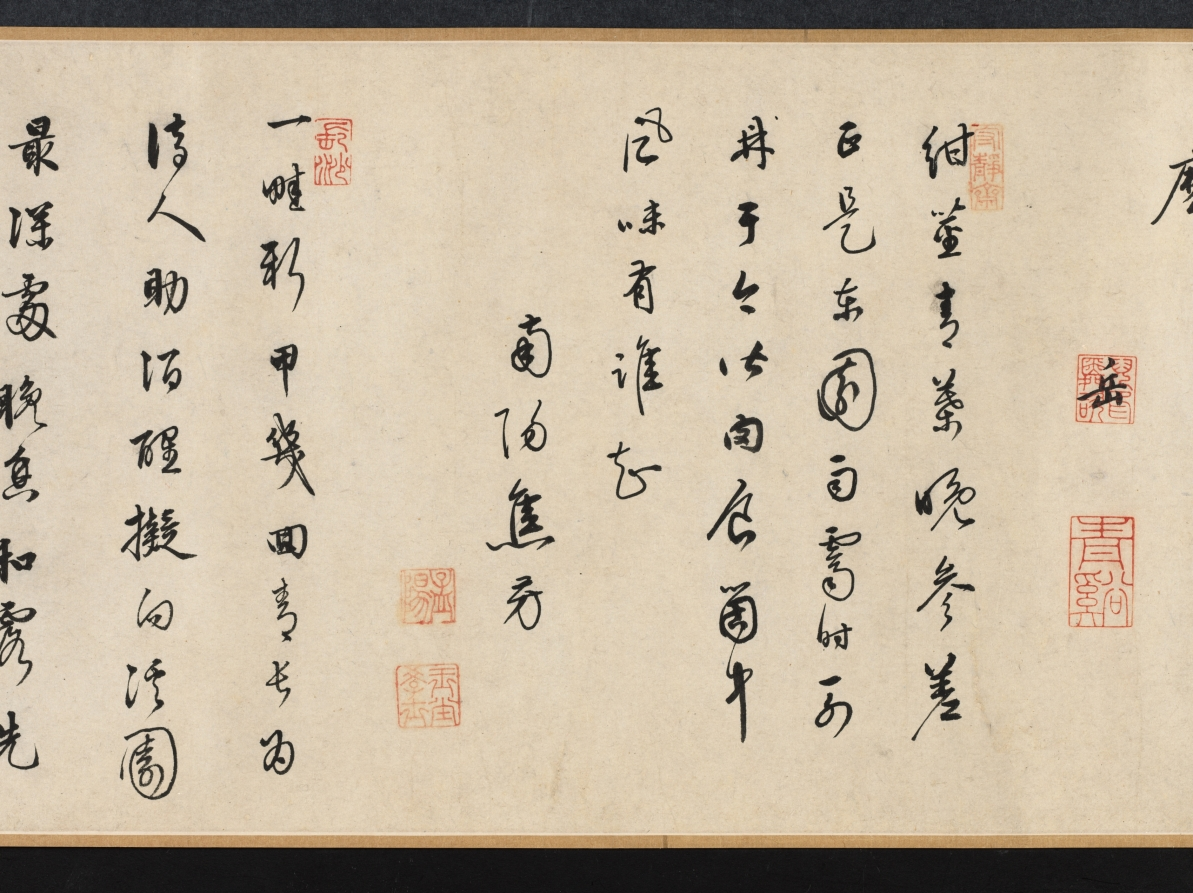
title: Chrysanthemums and Cabbage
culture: China, Ming dynasty (1368–1644)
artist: Tao Cheng (Chinese, active c. 1471–after 1502)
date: c. 1486 or before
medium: handscroll, ink and slight color on paper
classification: Painting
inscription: Artist's seal at beginning of painting: Yun hu 雲湖. Title by Wang Wenzhi 王文治 (1730–1802), date 1756. 2 seals of Wang Wenzhi 王文治 (1730-1802); 3 seals of Ku Yün (n. d.)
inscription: Section A (Chrysanthemums): 1 poem and 1 seal of Zhang Yuanzhen 張元禎 (1437–1507) - Jinshi, 1461; 1 poems and 3 seals of Ni Yue 倪岳 (1444–1501) - Jinshi, 1464; 1 poems and 2 seals of Zhao Xiang 趙祥 (life dates unknown) - Jinshi, 1469; 1 poems and 1 seals of Wu Xixian 吳希賢 (1437–1489) - Jinshi, 1464; 1 poems and 1 seals of Lü Chang 呂㦂 (1449–1511) - Juren, 1471; 1 poems and 3 seals of Fu Han 傅瀚 (1435–1502) - Jinshi, 1464; 1 poems and 1 seals of Feng Jue 馮珏 (life dates unknown) - Jinshi, 1478.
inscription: Chrysanthemums section, poem 1, by Zhang Yuanzhen 張元禎 (1437–1507): Several bushes of chrysanthemums grow in front of the Five-Willow Cottage,/ The yellow ones are really yellow and the white ones white./ This affable and decent fellow, young in years and unsophisticated,/ Has snapped one of the branches to dip in ink. (The Five-Willows Cottage was the home of the poet Tao Qian 陶潛 (Tao Yuanming 陶淵明, AD 365-427).) Chrysanthemums section, poem 2, by Ni Yue 倪岳 (1444–1501): Where at the Eastern Fence can you grieve for the Soul of the Xiang River?/ A man of upright character is mourned within the traces of ink./ White jade with a slight flaw would be a grievance forever,/ Later men should understand why even the roots of the flowers are washed. (Eastern Fence refers again to the poet Tao Qian 陶潛, while the Soul of the Hsiang River refers to the poet Qu Yuan 屈原 (c. 340–278 BC).) Chrysanthemums section, poem 3, by Zhao Xiang 趙祥 (life dates unknown): A clump of chrysanthemum grows in front of the bamboo pavilion,/ The winds of many autumns have blown since we parted beyond the river./ Straining wine through the official's cap of Tao [Qian] to prolong autumn's pleasures,/ The mists and clouds of ten thousand miles belong to the intoxicated. Chrysanthemums section, poem 4, by Wu Xixian 吳希賢 (1437–1489): It is a different spring if mulberry is planted during the latter part of the year,/ The dust of the world originally did not drop on clothing./ Who spills out ink under the Eastern Fence/ And paints so freely this portrait of chrysanthemums for the venerable Sir Tao? Chrysanthemums section, poem 5, by Lü Chang 呂㦂 (1449–1511): This full tray of ink for painting [flowers] at the Eastern Fence;/ Their whiteness or yellowness is not essential in capturing their beauty./ I don't have to go to Jiangnan to see them myself./ At my old house grow two or three branches. Chrysanthemums section, poem 6, by Fu Han 傅瀚 (1435–1502): Who daubed autumn flowers with ink/ As if they were dark dew on a branch tip only vaguely seen at evening?/ After the lazy clouds disperse, no one paints;/ A certain unconventionality pervades this painting. Chrysanthemums section, poem 7, by Feng Jue 馮珏 (life dates unknown): To satisfy his hunger, [the chrysanthemums] have at times entered the poetry of Qu Yuan;/ Taking up the wine cup, it felt close to Tao Qian./ [With them I am like] a lonely root sustained by deep water/ Or an old man to whose hair the color of youth returns.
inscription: Section B (Cabbage): 1 poem and 1 seal of Cai Qi 蔡圻 (life dates unknown) - degree information not known; 1 poems and 3 seals of Ni Yue 倪岳 (1444–1501) - Jinshi, 1464; 1 poem and 3 seals of Jiao Fang 焦芳 (1436–1517) - Jinshi, 1464; 1 poem and 3 seals of Li Dongyang 李東陽 (1447–1516) - Jinshi, 1464; 1 poems and 1 seals of Wu Xixian, signed “Xixian” 吳希賢 - Jinshi, 1464; 1 poems and 3 seals of Fu Han 傅瀚 (1435–1502) - Jinshi, 1464; 1 poems and 1 seals of Lü Chang 呂㦂 (1449–1511) - Juren, 1471; 1 poems and 2 seals of Zhao Xiang 趙祥 (life dates unknown) - Jinshi, 1469; 1 poems and 1 seals of Feng Jue 馮珏 (life dates unknown) - Jinshi, 1478.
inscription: Cabbage section, poem 1, by Cai Qi 蔡圻 (life dates unknown): The ink splashes are fresh from a frosty brush dipped in pond water;/ I can visualize that time when Yunhu 雲湖 [Tao Cheng] first showed his talents./ I lament the places where I scribbled before,/ Who would open them to inscribe a poem? (The first line is an allusion to the famous Jin dynasty calligrapher Wang Xizhi 王羲之 (AD 303-361), who practiced calligraphy so diligently at the edge of a pond that the water turned black with ink.) Cabbage section, poem 2, by Ni Yue 倪岳 (1444–1501): After rain the vegetables begin to grow;/ How are the colors of the masses lately!/ Once you get used to them, the tastiest parts are the ends of the roots;/ I don't know if they can be used for "seasoning soup." ("Seasoning soup" is an allusion to the statesmanship of a chief minister.) Cabbage section, poem 3, by Jiao Fang 焦芳 (1436–1517): This crop of purple stalks and green leaves is late and irregular;/ Now the rainy season is over for the Eastern Garden./ All the nobles nowadays dine on meat;/ Who of them knows the flavor of this [cabbage]. Cabbage section, poem 4, by Li Dongyang 李東陽 (1447–1516): It's always helped the honest man to sober up after drinks./ I intend to go to the deepest part of the stream-crossed garden/ To refresh myself in the fragrance and dew of evening. Cabbage section, poem 5, by Wu Xixian 吳希賢 (1437–1489): After rain, the white silk is filled with fragrant vegetables;/ How many times this happens in Mr. Tao's paintings./ On whom will you depend to present a memorial to the ruler?/ Don't let this color emerge on the faces of the people. (The last line is meant as a warning to officials: the color of the vegetables (green) may be pleasing in itself, but when it emerges on the faces of the starving poor, it signifies a badly governed world.) Cabbage section, poem 6, by Fu Han 傅瀚 (1435–1502): For twenty years I have feasted on the excellent mutton of an official;/ Yet I talk and dream about the garden and its vegetables./ Do not merely say it is good to chew the root of the cabbage--/ You must taste to understand what poverty is. Cabbage section, poem 7, by Lu Chang 呂㦂 (1449–1511): The capital is never a place for an apprentice in the "garden of scholarship."/ Who would write about gardens and vegetables on an examination paper?/ I've walked throughout the country in spring;/ Make sure the people don't show this color. Cabbage section, poem 8, by Zhao Xiang 趙祥 (life dates unknown): After a wash of rain, the spring garden is still in order;/ The flavor [of the cabbage] is more suitable with a small drink and the hum of a tune./ The rich and powerful in their mansions consume dish after dish of meat;/ Vegetarian food is known only by the scholars. Cabbage section, poem 9, by Feng Jue 馮珏 (life dates unknown): A new cabbage is nourished with dew;/ It takes a long time to grow and mature./ The business of "seasoning the soup" is your responsibility;/ Better command the gardener to take care [of the cabbages]. trans. HK/LYSL/WKH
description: On an autumn day in Beijing, Tao Cheng had a gathering with a group of scholar-officials and created two paintings in a spontaneous, casual style. The first depicts chrysanthemums, slender bamboo stalks, and a rock in monochrome ink. Tao applied light colors for the second painting that depicts cabbage. Tao deliberately placed the images on the first sections of the paper so that his honorable guests could add their poetic inscriptions inspired by his imagery. In the first section to the right, all seven poetic inscriptions refer to the beloved poet and recluse Tao Qian (also called Tao Yuanming, AD 365–427) who was particularly known for his profound love for chrysanthemum flowers. Most of the inscriptions in the second section express sympathy for the poor, since cabbage is the main ingredient in their humble food. Taken together, the poems and paintings allude to the life and responsibilities of the scholar-official: the importance of both an upright character and a concern for the poor citizens in order to achieve good government.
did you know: Eminent calligrapher Wang Wenzhi 王文治 was only 27 sui when he wrote the title in 1756.